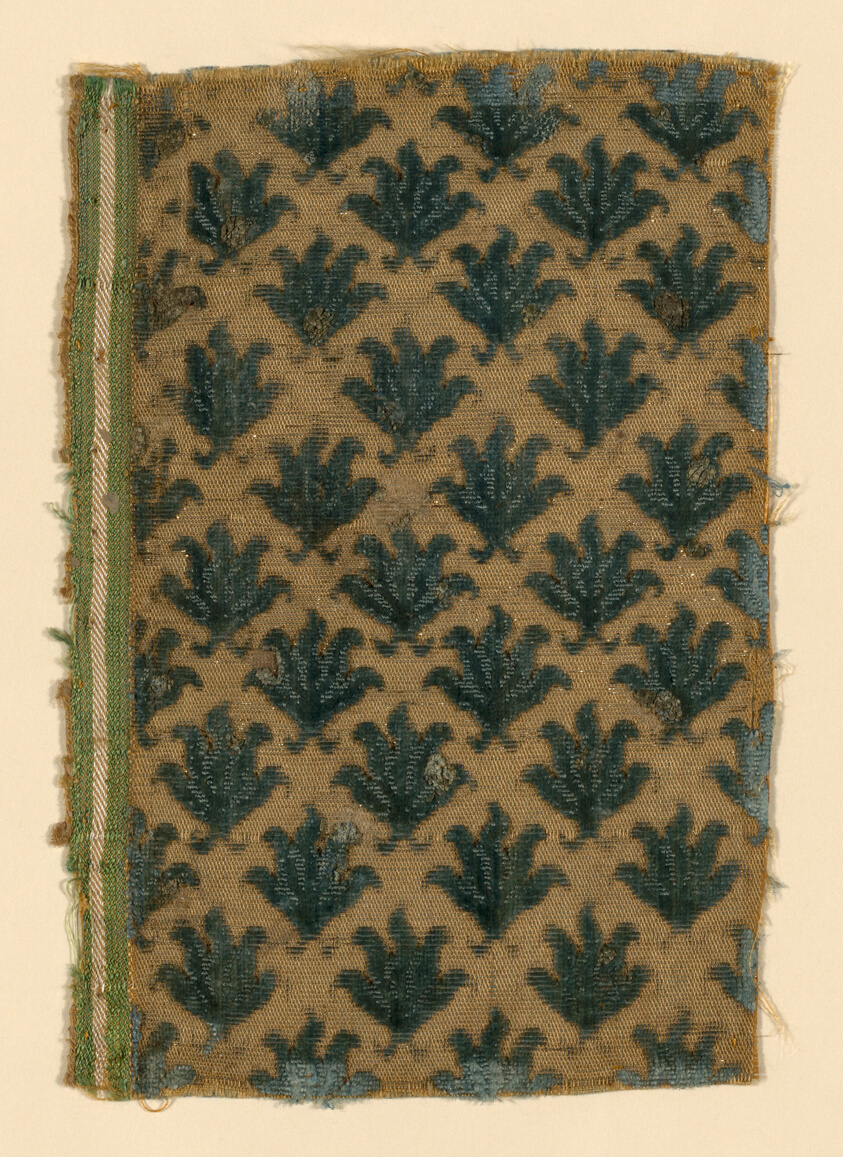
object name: Textile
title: Fragment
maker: Italy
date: Second half of the 17th century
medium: Silk, velvet: cut, uncut, voided; twill weave foundation and gilt strip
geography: Italy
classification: textile; weaving - velvet; weaving